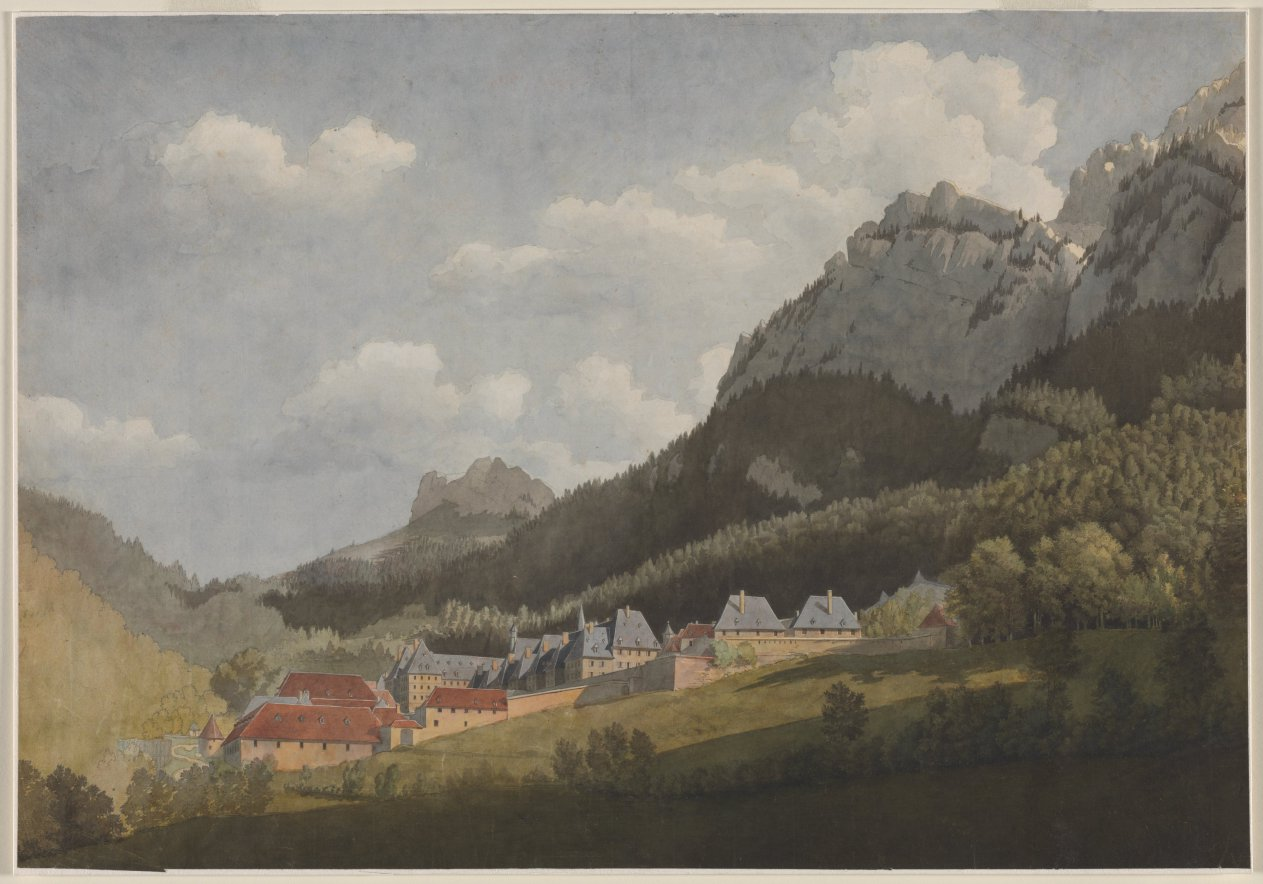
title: Paysage de la Grande Chartreuse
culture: France, 18th-19th century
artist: attributed to Jean Lubin Vauzelle (French, 1776–after 1837)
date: late 1700s-1800s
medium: watercolor with graphite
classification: Drawing